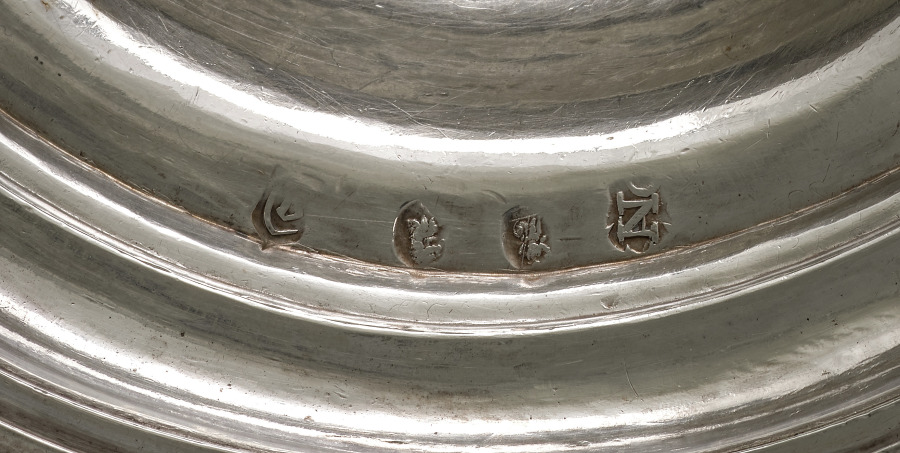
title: Two-Handled Cup (lid)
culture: England, London, 18th century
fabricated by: Anthony Nelme (British)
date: 1712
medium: silver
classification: Silver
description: Nelme was one of the most famous and successful native English silversmiths of a time when Huguenots (French Protestants) dominated the creation of richly decorated pieces for the most fashionable market.